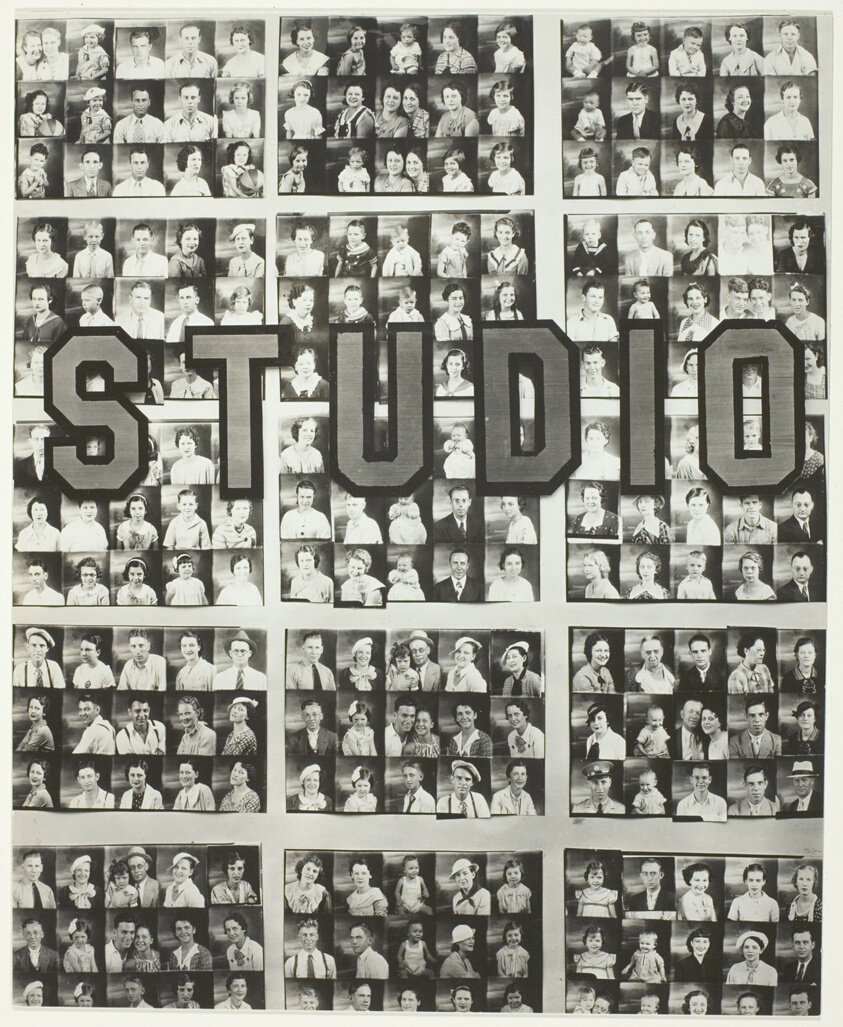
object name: Photograph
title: Penny Picture Display, Savannah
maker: Walker Evans (American, 1903–1975)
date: 1936, printed c. 1962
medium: Gelatin silver print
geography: United States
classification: gelatin silver (developing-out-paper) pr; photographic process; photography; photograph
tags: Collected by Hugh Edwards